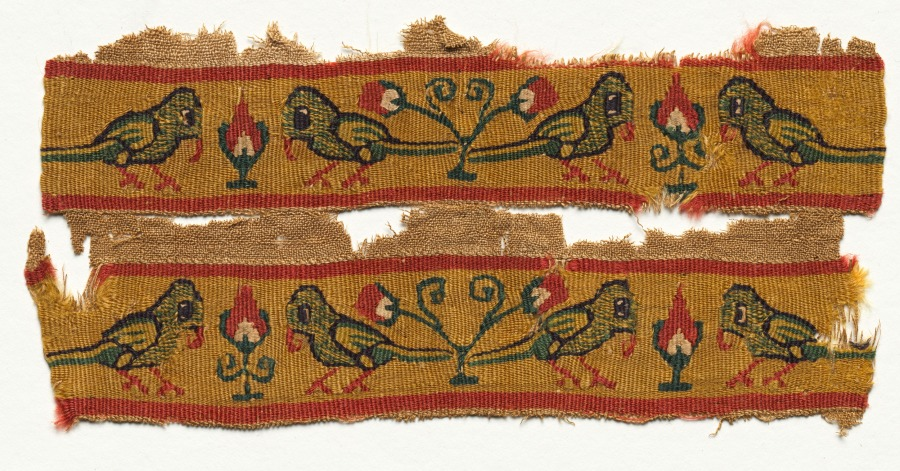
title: Sleeve Bands and Segmentum from a Tunic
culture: Egypt, Umayyad period (661–750)?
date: 600s–700s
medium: Wool and linen: tabby weave, inwoven tapestry ornament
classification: Textile